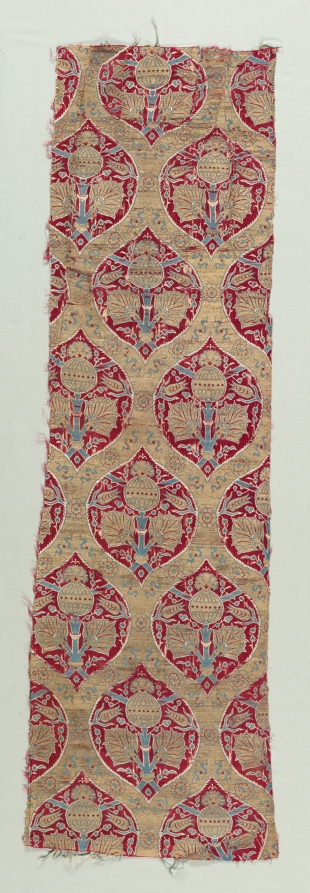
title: Ogival Lattice with Horizontal Design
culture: Turkey, Bursa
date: 1600–1650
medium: Silk and gilt-metal thread: lampas weave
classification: Textile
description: There is a pomegranate design in each ogee (pointed arch) of this silk brocade fragment. The pomegranate is a small tree originating in Persia (today’s Iran) bearing fruit of deep red flesh filled with hundreds of seeds. The pomegranate has been revered as a symbol for health and fertility by many civilizations. In Islam the pomegranate is associated with paradise as described in the Qur’an.